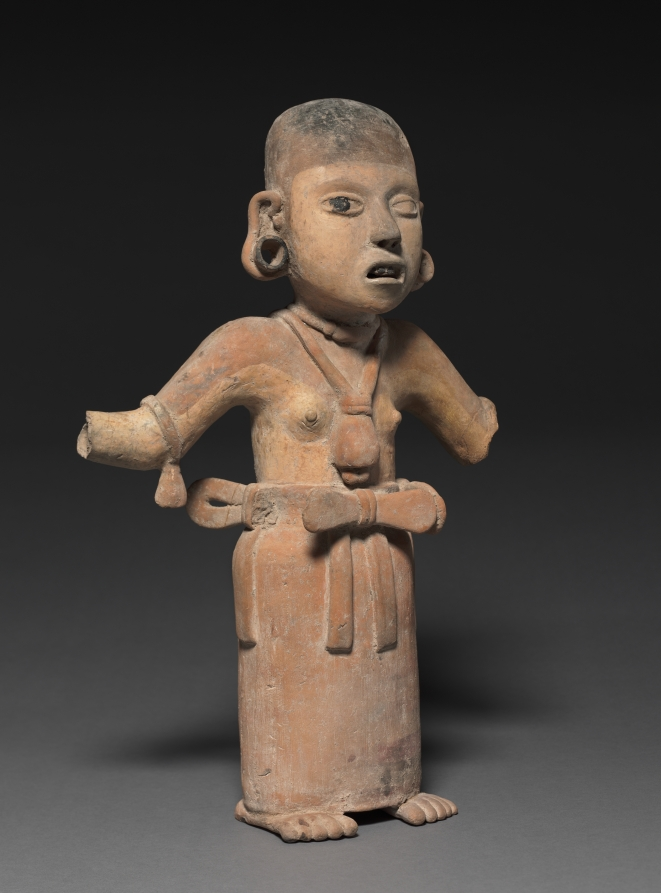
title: Female Figure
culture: Mexico, Southern Veracruz, Limon, Remojades Monumental Sculpture type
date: 200–500 CE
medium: pottery with burnished buff slip and asphalt paint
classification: Sculpture